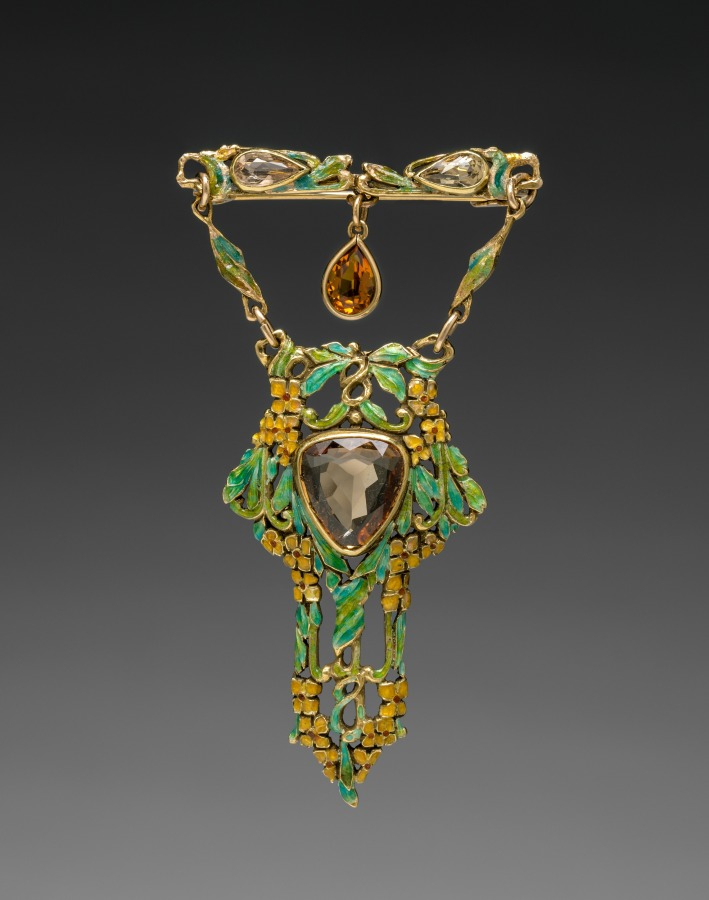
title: Pendant Brooch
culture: America, Ohio, Cleveland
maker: Potter Studios (American)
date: c. 1905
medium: enamel, gold, citrines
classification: Jewelry